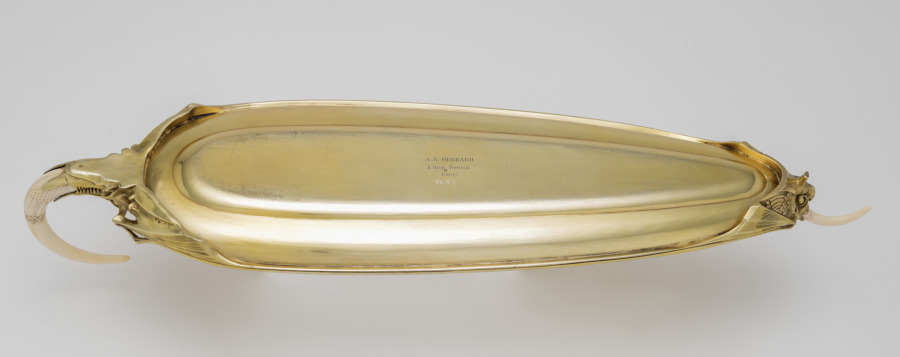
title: Tray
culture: France, Paris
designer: Carlo Bugatti (Italian, 1856–1940)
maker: Adrien-Aurélien Hebrard (French, 1866–1937)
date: c. 1907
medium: Gilt silver and ivory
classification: Silver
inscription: Made by A. A. Hebrard Firm, Paris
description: This tea and coffee service, salver, and table, together with some now missing cups, were all designed by Carlo Bugatti as an ensemble and presented at the 1902 exposition devoted to decorative arts in Turin, Italy. The set was probably acquired from Bugatti's 1907 exhibition at the Galerie Hébrard in Paris by a wealthy South African widow, Anna Blake, who was living there at the time. Some of the animal and insect motifs suggest mythical beasts or the fossils of prehistoric animals. When Mrs. Blake returned to Cape Town, she took these and other pieces designed by Bugatti with her, and they remained in South Africa throughout her lifetime.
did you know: This tray is part of a tea and coffee service designed by Carlo Bugatti.